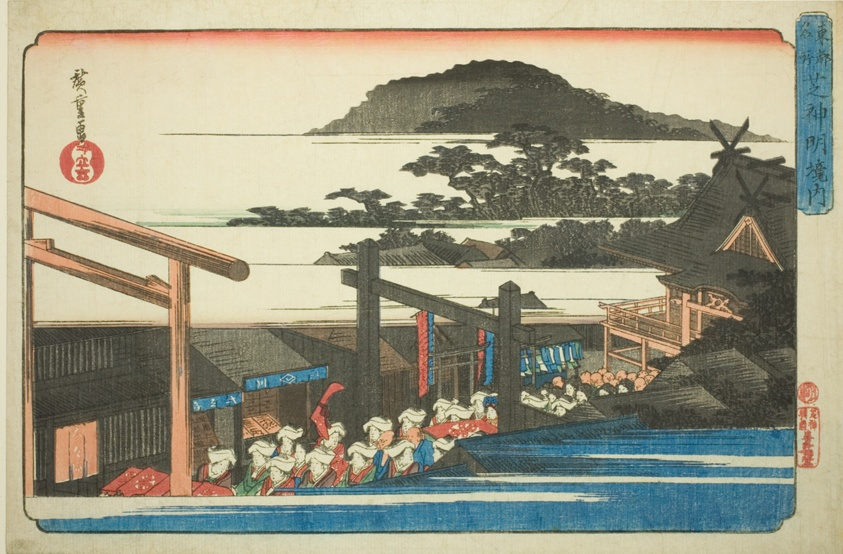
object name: Print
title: Precincts of the Shiba Shinmei Shrine (Shiba Shinmei keidai), from the series "Famous Places in the Eastern Capital (Toto meisho)"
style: Japanese (culture or style)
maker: Utagawa Hiroshige 歌川 広重; Japanese, 1797-1858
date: c. 1832/38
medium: Color woodblock print; oban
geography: Japan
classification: woodblock print; print; asian art